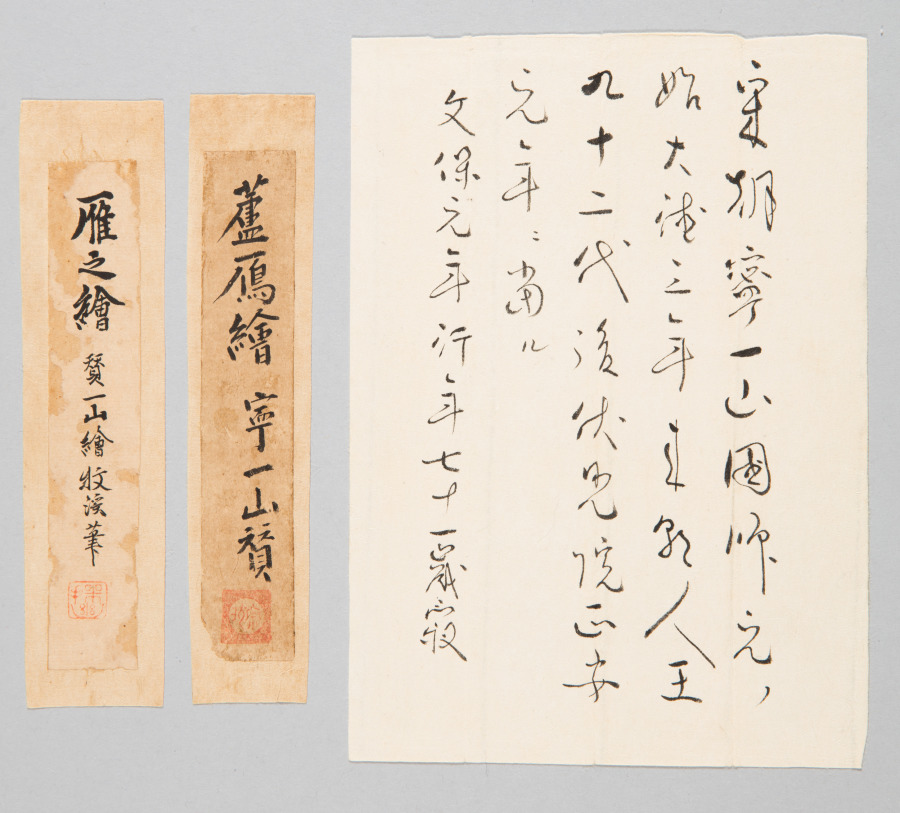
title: Reeds and Geese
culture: Japan, Kamakura period (1185–1333)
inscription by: Yishan Yining [Issan Ichinei] (Chinese, 1247–1317)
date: 1314–17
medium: hanging scroll; ink on paper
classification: Painting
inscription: signed: Issan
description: Reeds and geese has been a common pairing in Chinese literary and visual culture for many centuries. This painting presents the contribution of a Japanese amateur painter, almost certainly a Zen Buddhist monk, to Japan’s fledgling efforts to add the theme to its own cultural vocabulary in the early 1300s. As was customary at the time in Japan, the painter did not sign or seal his work; the inscription, a poem added to the painting by the eminent émigré monk Yishan Yining, along with his signature and seal, was of far greater cultural value. Today, the modestly sized painting has tremendous significance as one of the earliest surviving examples of Japanese ink paintings with reeds and geese.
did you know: Tokyo National Museum owns a copy of this painting made by Kano Gyokusen (1796–1864) when he was 14 years old.